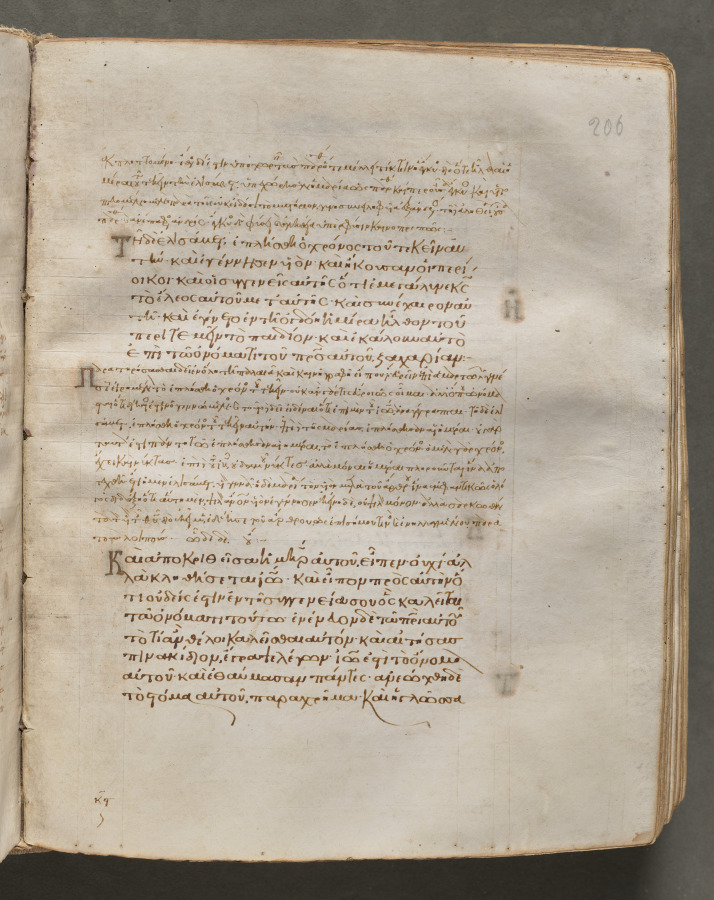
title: Text, folio 206 (recto), from a Gospel Book with Commentaries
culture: Byzantium, Constantinople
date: c. 1000–1100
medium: ink, tempera, and gold on vellum; leather binding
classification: Bound Volume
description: Each of the four gospels in this book opens on a page with brilliantly illuminated borders depicting the author of the text as well as birds-principally peacocks, symbols of the immortality of the soul-and fountains, representing the fountain of life and the salvation of the soul. This volume consists of 428 leaves with texts in Greek. Its level of sophistication suggests that it was probably written and decorated in a monastery in Constantinople.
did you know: Gospel Books were carried in procession through Byzantine churches.